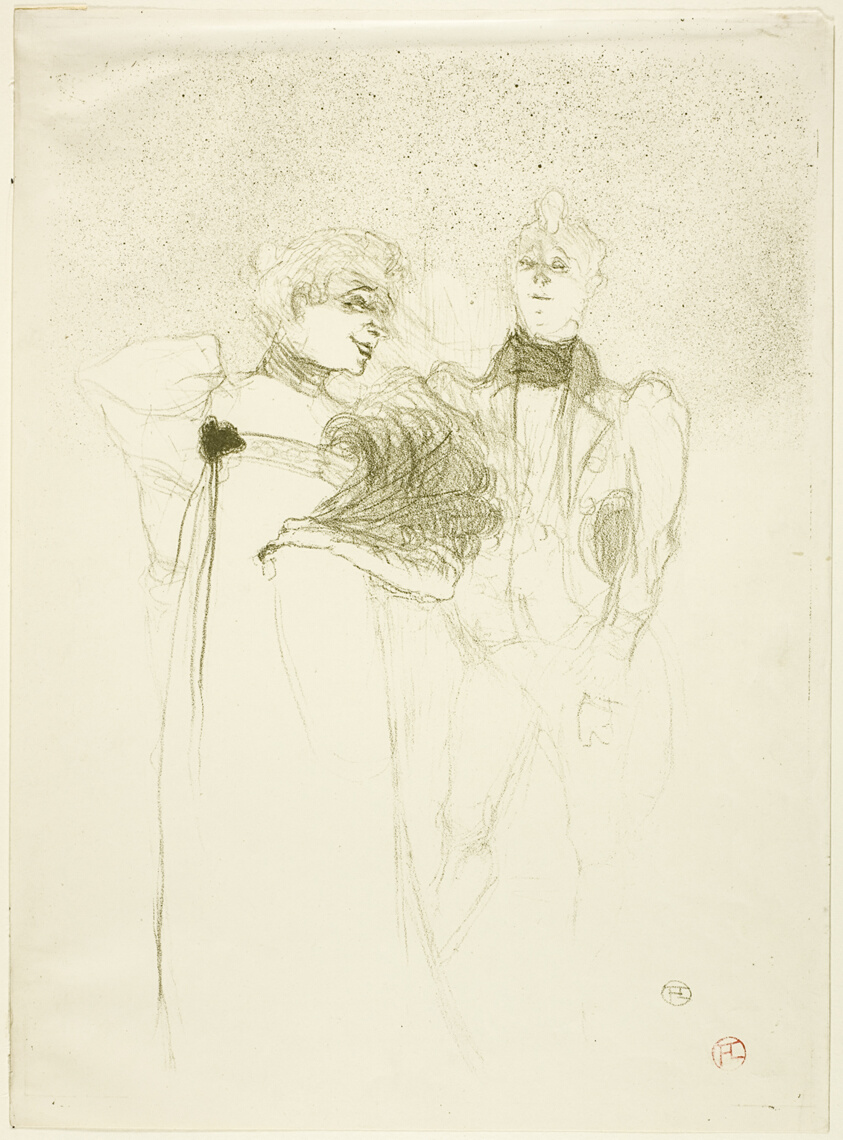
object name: Print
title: Mademoiselle Lender, in Madam Satan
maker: Henri de Toulouse-Lautrec (French, 1864-1901)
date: 1893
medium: Color lithograph on cream wove paper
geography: France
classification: lithograph; print; prints and drawing